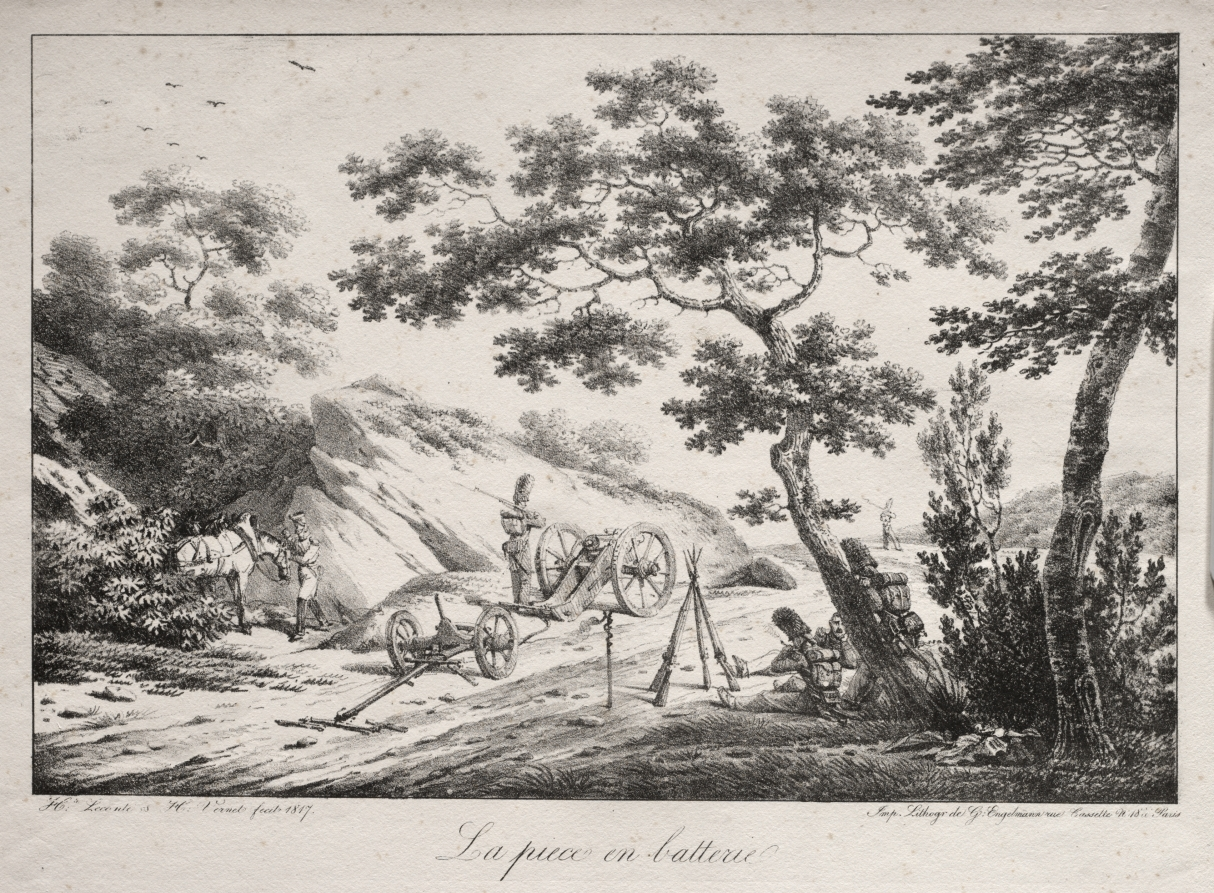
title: The Canon Ready to Fire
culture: France, 19th century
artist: Hippolyte Lecomte (French, 1781–1857)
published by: printed by: G. Engelmann, Paris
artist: and Horace Vernet (French, 1789–1863)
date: 1817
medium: lithograph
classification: Print